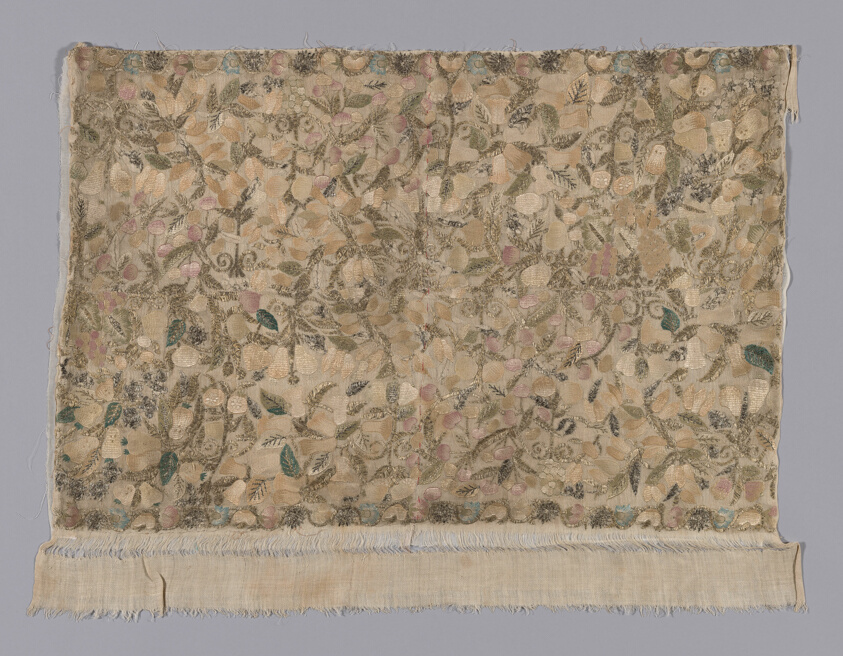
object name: Textile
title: Panel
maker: Russia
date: 1801/25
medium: Linen, twill weave; embroidered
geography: Russia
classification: textile; needlework (visual works)